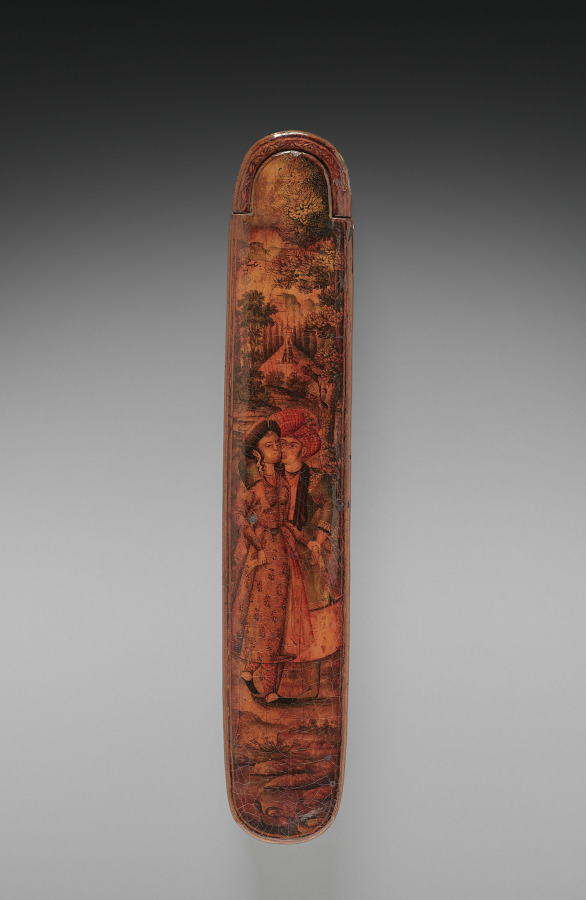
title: Pen and Ink Box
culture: Iran, probably Isfahan, Safavid period (1501–1722)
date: 1667–98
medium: Varnished lacquer and opaque watercolor over papier-mâché, ink, and copper alloy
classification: Lacquer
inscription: 1109